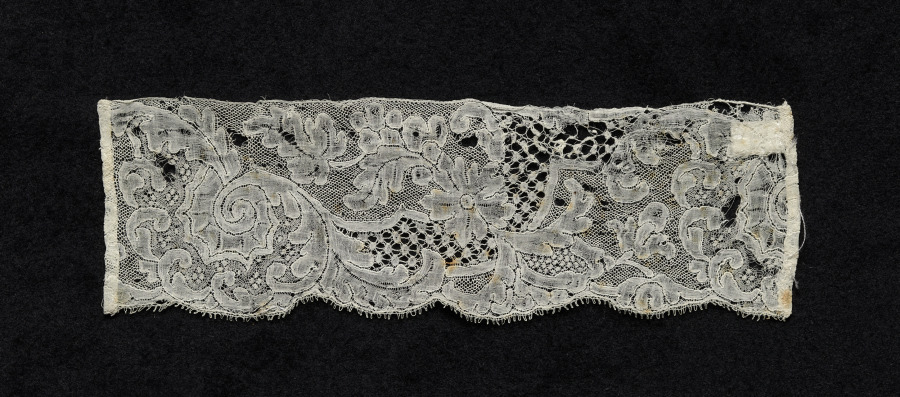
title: Lace Edging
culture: Belgium, Mechelen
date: 1700s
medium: Linen: bobbin lace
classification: Lace